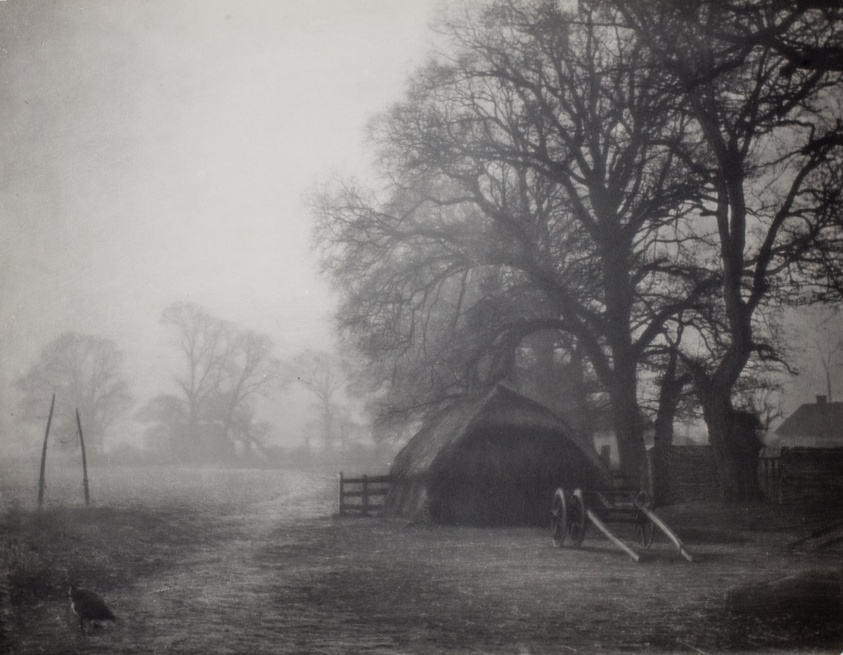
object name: Photograph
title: Old Shoreham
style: 19th century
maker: Charles Job (English, c. 1853–1930)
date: c. 1891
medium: Platinum print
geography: United Kingdom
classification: photograph; photography